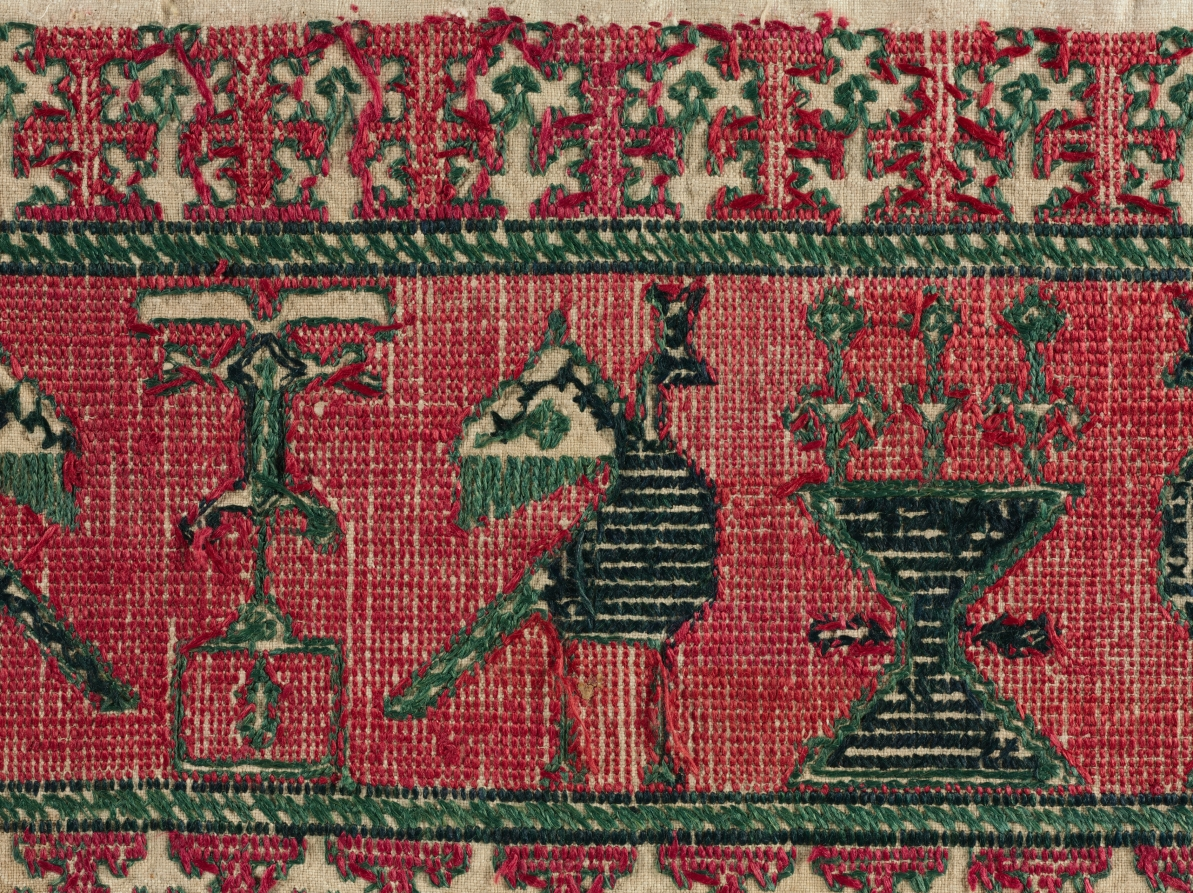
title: Fragment of a furnishing textile (one of five)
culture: Africa, North Africa, Morocco, Azemmour, Moroccan embroiderer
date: 1700s–1800s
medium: Linen, silk, dye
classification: Embroidery